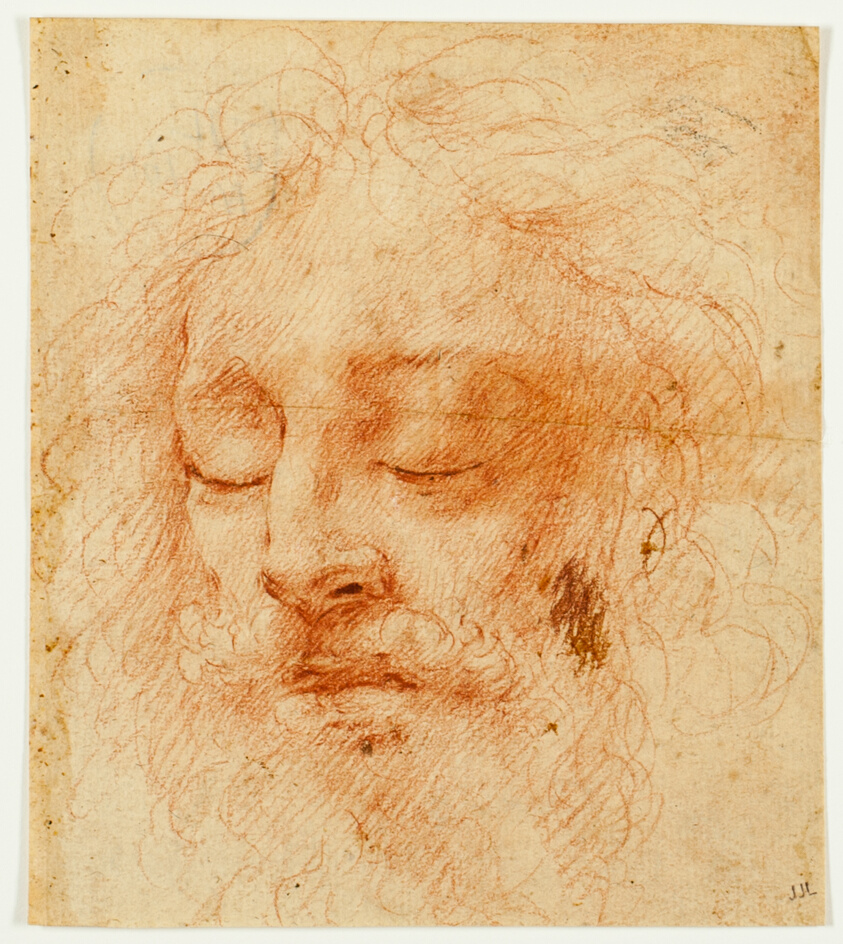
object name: Drawing and Watercolor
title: Head of a Sleeping Man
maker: Possibly by Correggio; Italian, c. 1494-1534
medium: Red chalk with stumping and traces of graphite, on buff laid paper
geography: Italy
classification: chalk; drawings (visual works); prints and drawing